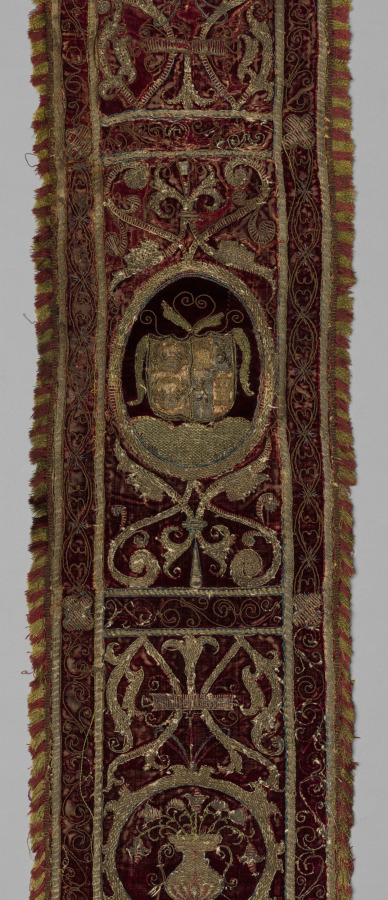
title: Embroidered Strip of Velvet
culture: Spain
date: 1500s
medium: embroidery: silk and gold thread on velvet, fringe border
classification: Velvet